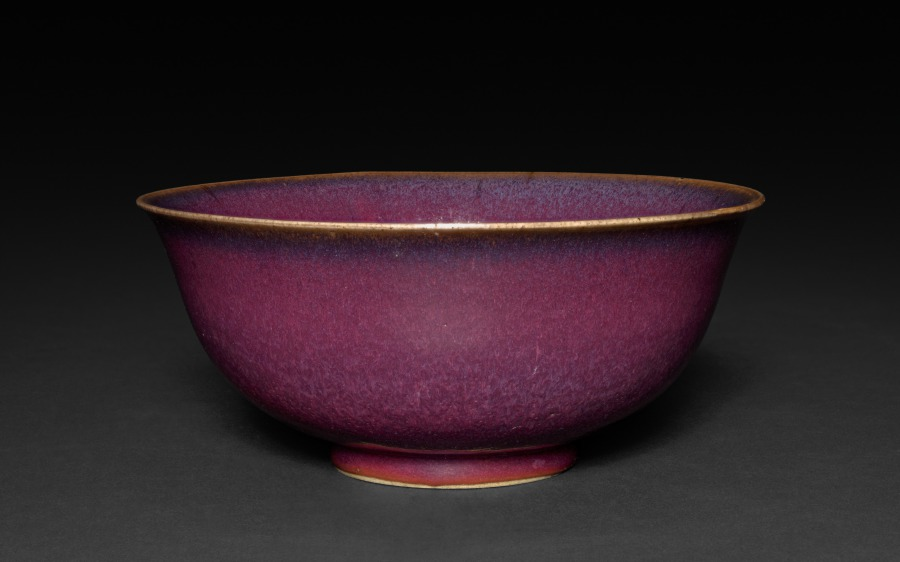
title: Bowl: Jun ware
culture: South China, Yuan dynasty (1271-1368) - Ming dynasty (1368-1644)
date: 14th-15th Century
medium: glazed gray stoneware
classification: Ceramic